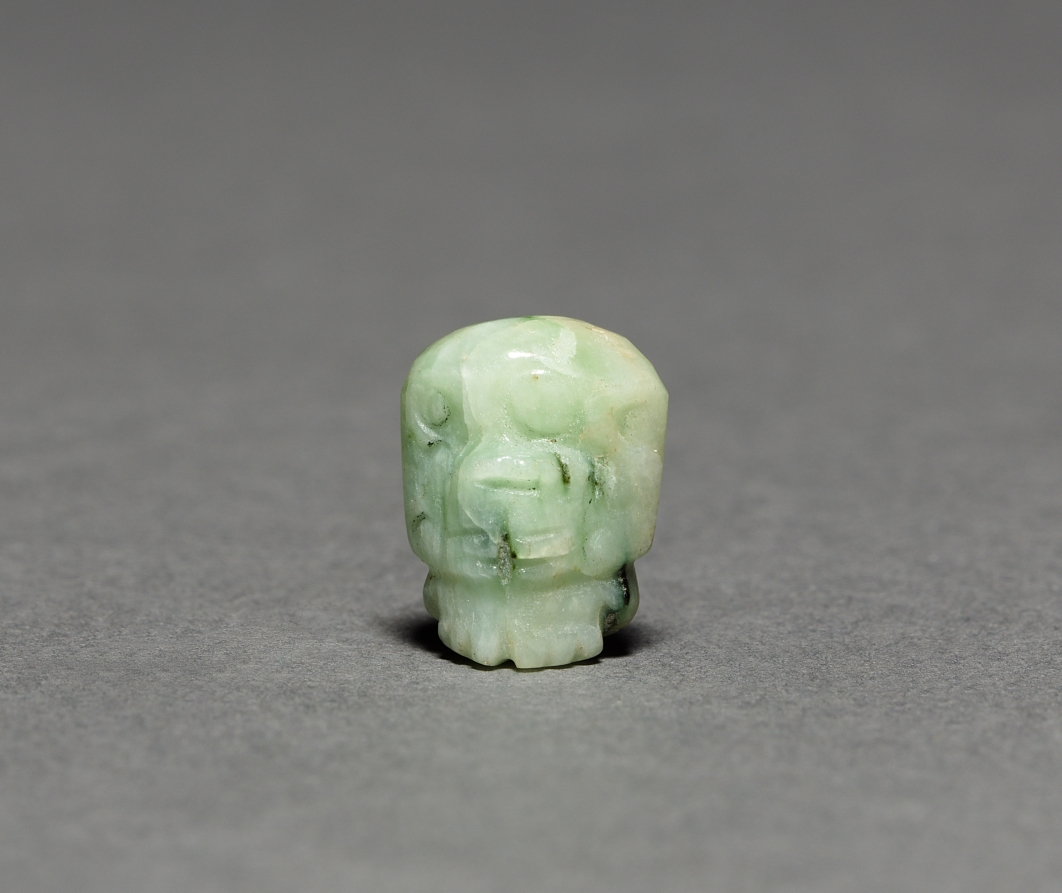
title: Seated Figurine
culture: Mexico, Oaxaca, Xoxo, Mixtec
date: 1200–1519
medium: jade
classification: Sculpture